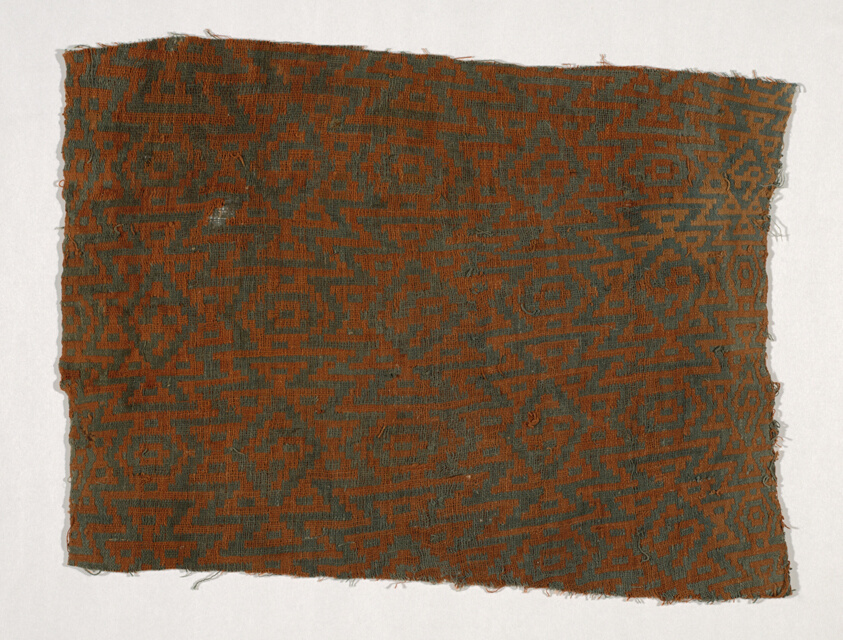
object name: Textile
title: Fragment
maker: Chiquerillo, Palpa Valley, south coast, Peru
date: A.D. 900/1476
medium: Cotton, plain weave, double cloth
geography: Peru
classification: textile; weaving